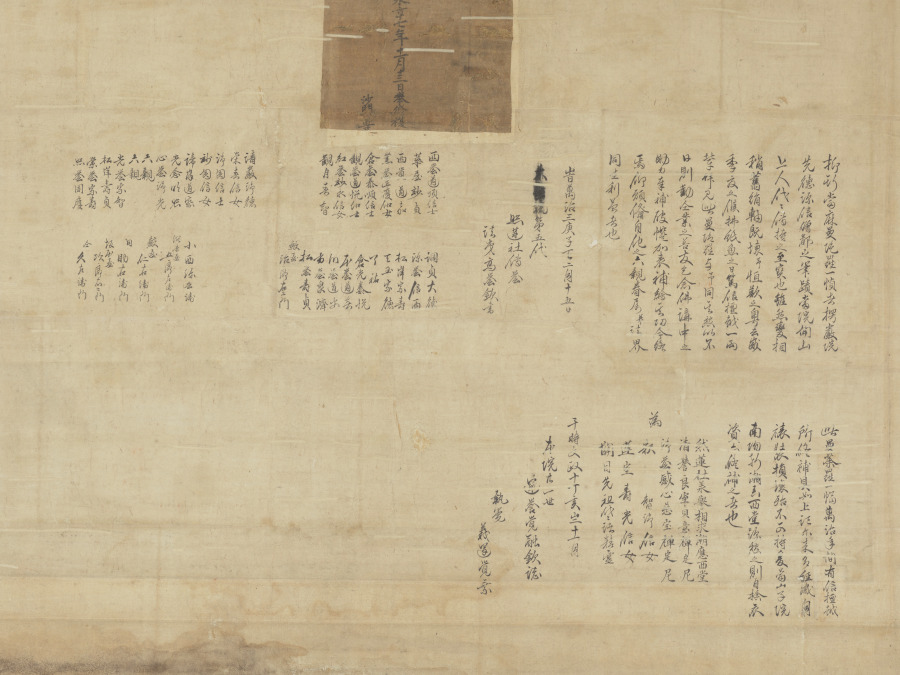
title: Taima Mandala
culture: Japan, Kamakura period (1185–1333)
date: early 1300s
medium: hanging scroll; ink, color, and gold on silk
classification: Painting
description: This painting is a copy after an 8th-century woven mandala belonging to the temple Taimadera. The composition is based on a sacred text that describes the Buddha Shakyamuni’s explanation of Amida’s Pure Land to Queen Vaidehi, as well as his instructions to her on visual meditation upon the Pure Land. The Pure Land appears at the center of the painting. To the left is the story of Queen Vaidehi’s encounter with Shakyamuni, and to the right are the scenes she is given to visualize. The bottom illustrates the nine levels of birth that can be attained in the Pure Land.